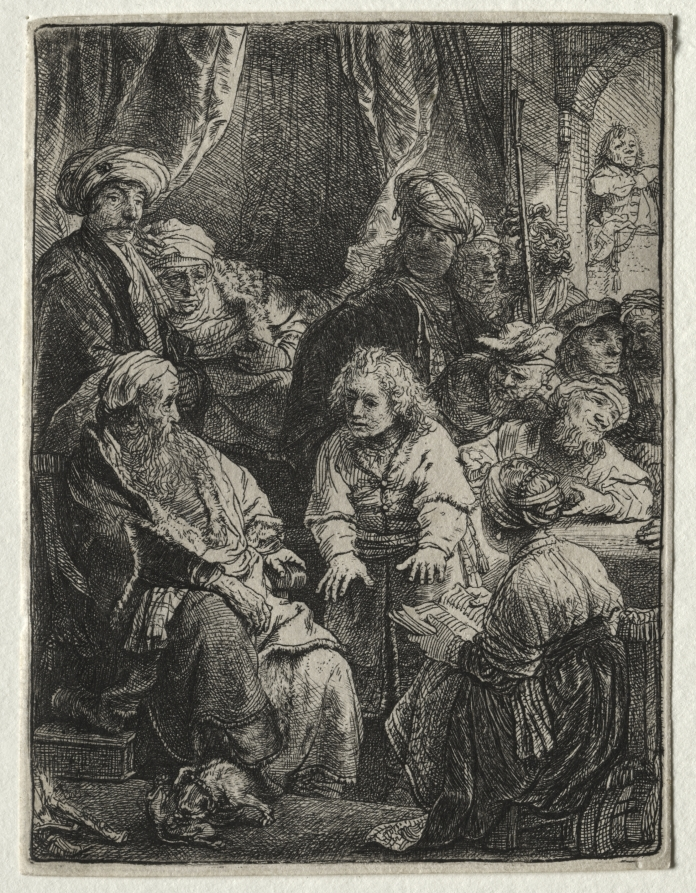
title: Joseph Telling his Dreams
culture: Netherlands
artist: Rembrandt van Rijn (Dutch, 1606–1669)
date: 1638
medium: etching with drypoint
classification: Print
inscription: lower left, in plate: Rembrandt f. 1638 ; VERSO, upper left, in graphite: H. 37 ; upper left, in graphite: No [1?]2 ; upper right, in pen and brown ink: No. 29. ; center left, in graphite (sideways): [illegible] ; center right, in pen and brown ink: [illegible] ; lower left, in red chalk: 42 ; lower left, in graphite: 998 ; lower center, in graphite: [various illegible and erased inscriptions] ; lower right, in graphite: Th[cut off by a hinge]